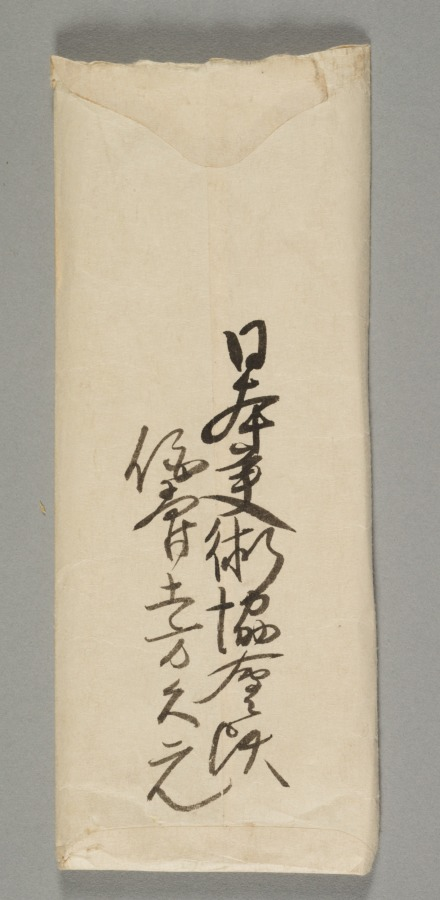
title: Fujiwara no Muchimaro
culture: Japan, Kamakura period (1185–1333)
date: 1200s or 1300s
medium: Hanging scroll; ink, color, gold, and cut gold on silk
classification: Painting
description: This portrait of Fujiwara no Muchimaro (680–737), a grandson of Fujiwara no Kamatari (614–669), includes an image of Buddha Dainichi Nyorai above his head. By situating the image of Dainichi there, this painting would seem to assert that Muchimaro is an avatar of Dainichi. In the same way that kami could be identified with Buddhist counterparts, powerful humans could also be seen as manifestations of Buddhist deities. A similar painting is at Eizanji in Nara, of which Muchimaro is known as the founder. It was once a branch temple of Kōfukuji, the Fujiwara family temple.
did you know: The boughs of wisteria appearing in the background symbolize the figure's status as a Fujiwara family member.